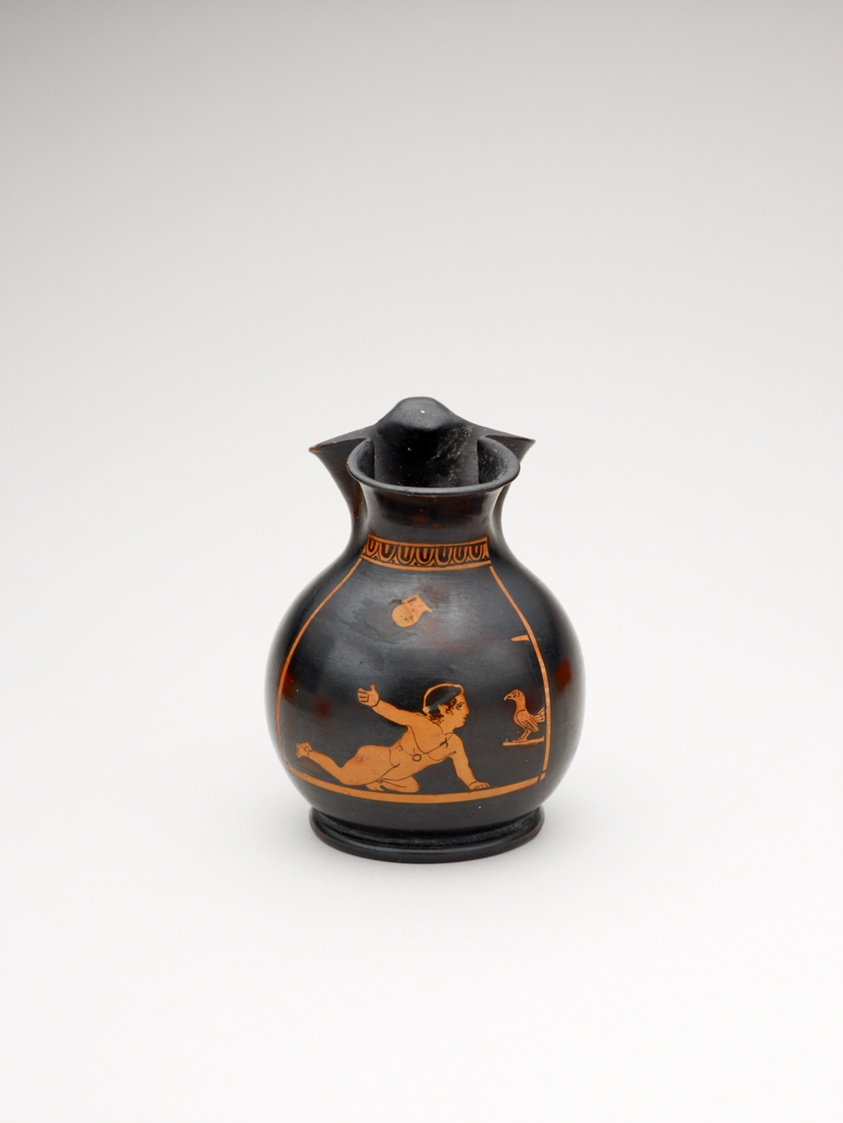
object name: Vessel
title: Chous (Toy Pitcher)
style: high classical, Classical, attic, red-figure, ancient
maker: Greek; Athens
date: 430-410 BCE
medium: Terracotta, red-figure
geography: Athens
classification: earthenware; ceramics; vessel; ancient art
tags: children